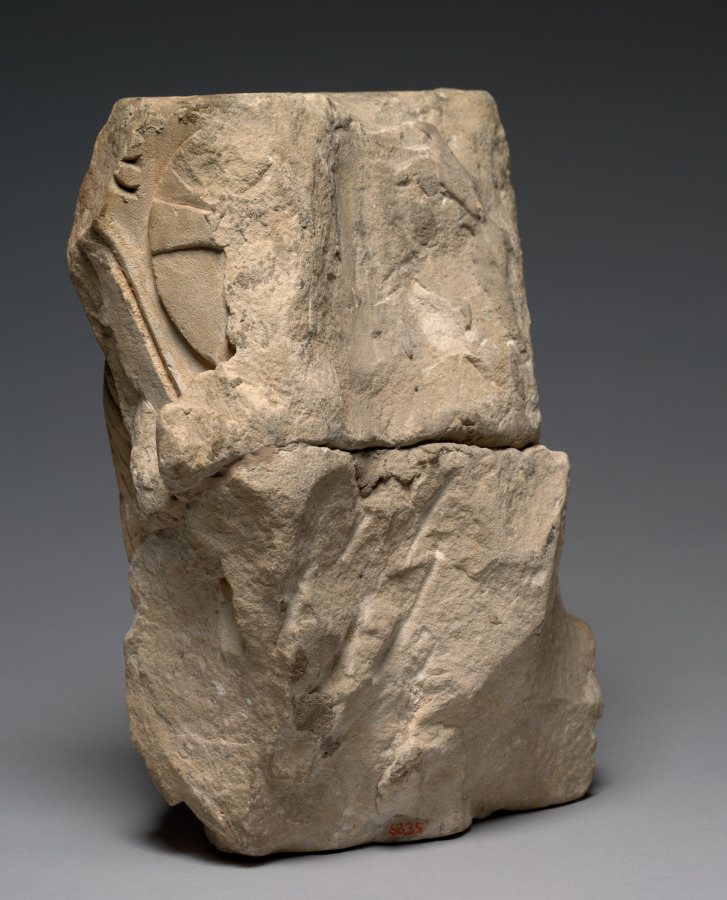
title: Fragment of a Double Capital: Mary and Martha at the Raising of Lazarus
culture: Southwest France, Ariège, region of Foix, mid-12th century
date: 1145–1165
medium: quartz sandstone with traces of polychromy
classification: Sculpture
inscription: inscription above the draped figures of Mary and Martha: "MARIA ET MARTA"; to the left of the two figures is a portion of a decorated sarcophagus depicted in the lower half with an inscription of Christ's words: "VENI FORAS" ([Lazarus] come forth).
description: The front face of this capital fragment presents the two mourning women identified by the inscription above: MARIA ET MARTA. On the left face appears the body of Lazarus in a sarcophagus bearing Christ's words: VENI FORAS ("[Lazarus], come forth" [John 11:43]). The Raising of Lazarus is one of the most popular themes in Christian art. This miracle represents Christ's power over death and thus prefigures the Resurrection. It also speaks of the hope of resurrection for all individuals, a common theme in early Christian catacombs and sarcophagi. The subject is less prevalent in sculpture of the Romanesque period, though quite popular in other media.